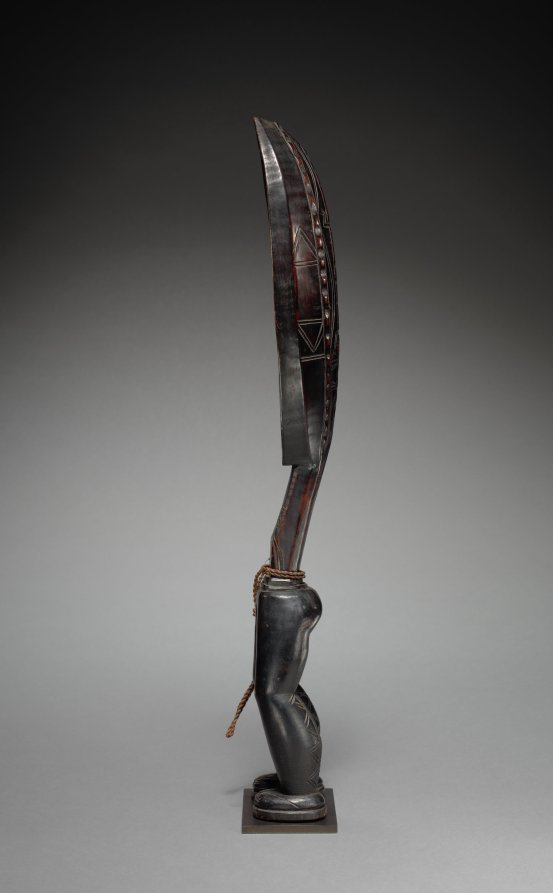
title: Ceremonial Ladle (Wunkirmian or Wakemia)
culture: Africa, West Africa, Côte d'Ivoire, Dan-style carver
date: possibly late 1800s or early 1900s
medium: Wood, twine, and possibly resin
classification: Sculpture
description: An emblem of great prestige, this human-shaped ladle would have been owned by a distinguished married woman recognized for her talents as a farmer and her exceptional generosity and hospitality. One of her responsibilities was to host a grand Feast of Merit when she, along with other highly respected women, prepared food for a large number of local and foreign guests. During the feast the women danced brandishing their rice-filled ladles while singing in strident voices.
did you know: This ladle was a status symbol for a notable woman.